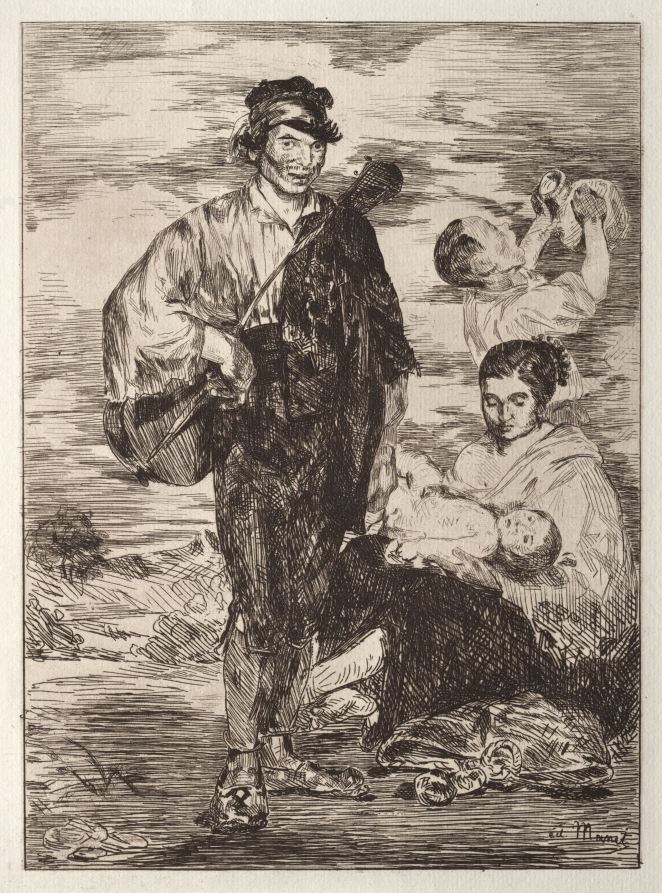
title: Les Gitanos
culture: France, 19th century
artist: Édouard Manet (French, 1832–1883)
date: 1862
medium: etching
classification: Print